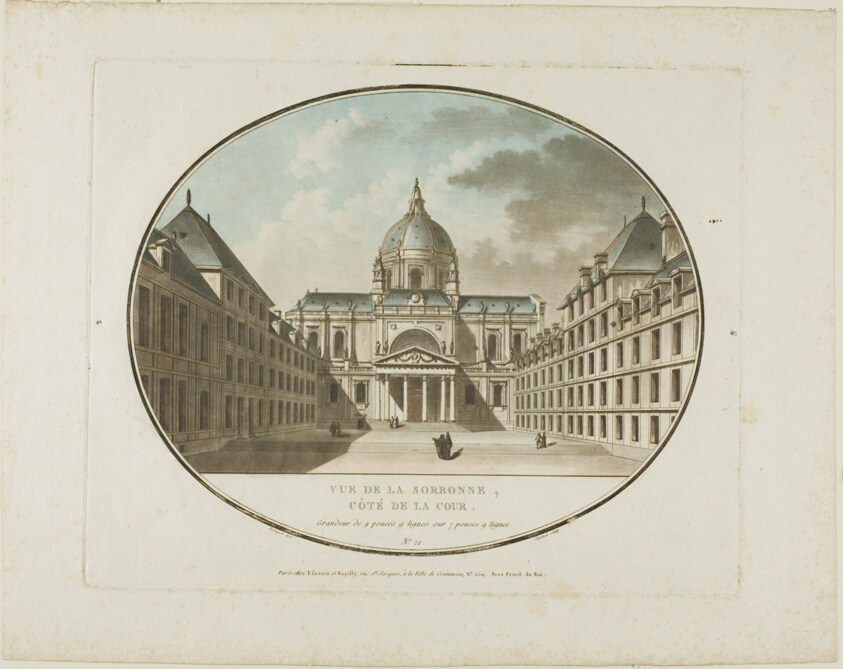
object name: Print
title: View of the Sorbonne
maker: Jean-François Janinet; French, 1752-1814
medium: Aquatint on paper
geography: France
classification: aquatint; print; prints and drawing